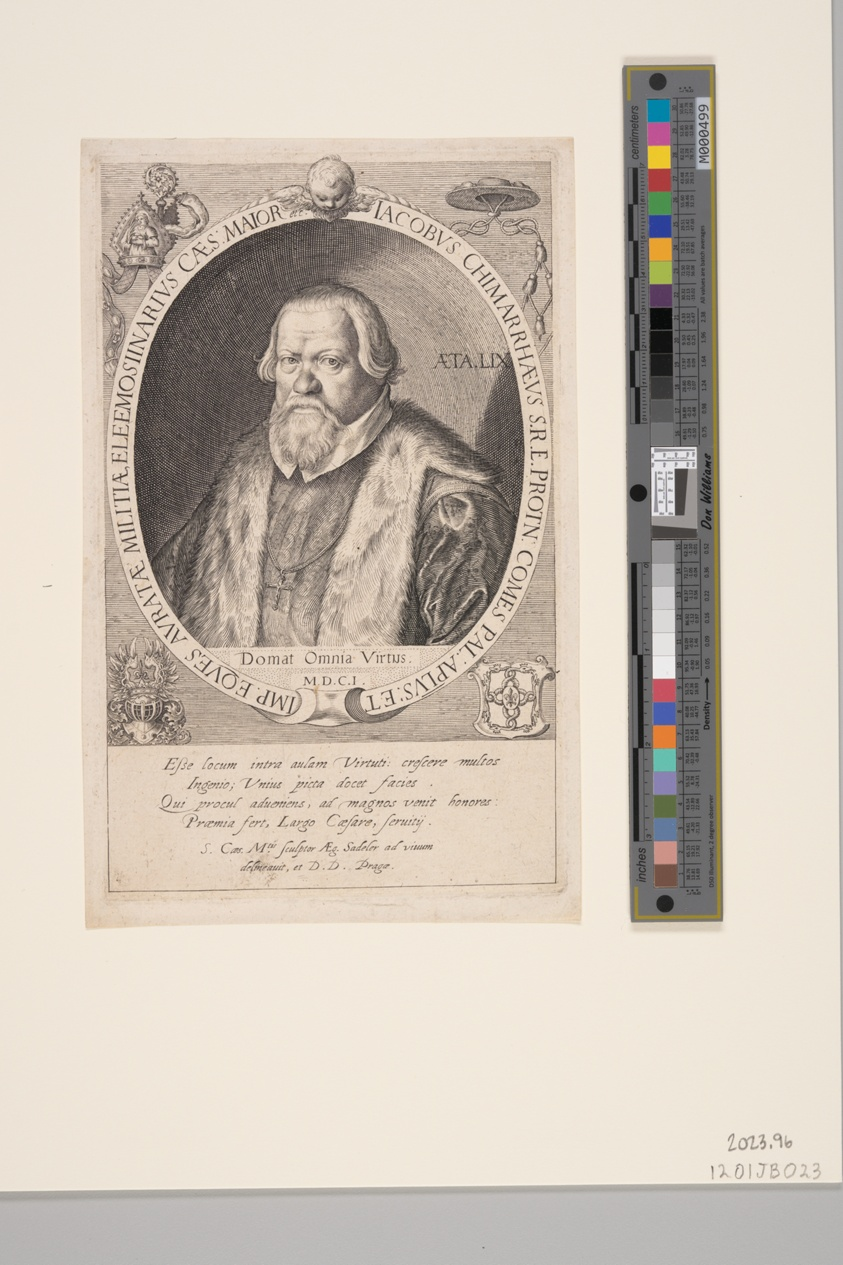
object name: Print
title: Jacob Chimarrhaeus, Grand Almoner of Rudolph II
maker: Aegidius Sadeler II; Flemish, c. 1570–1629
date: 1601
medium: Engraving on paper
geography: Flanders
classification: engraving; paper; print; prints and drawing